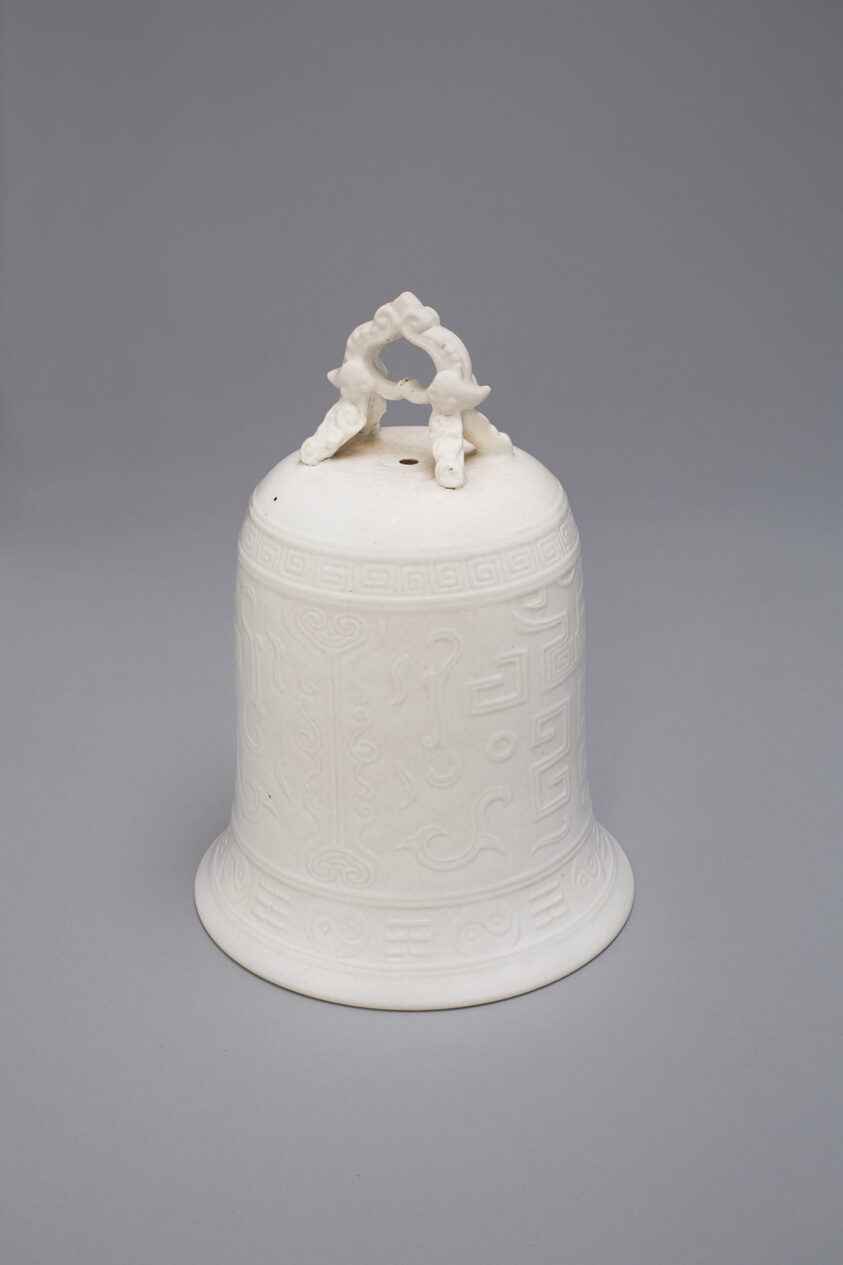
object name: Sculpture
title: Bell with Archaistic Motifs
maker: China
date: Qing dynasty (1644–1911), mid–17th century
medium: Dehua ware (blanc de chine); porcelain with underglaze mold-impressed decoration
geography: China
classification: porcelain; asian art; ceramics; sculpture